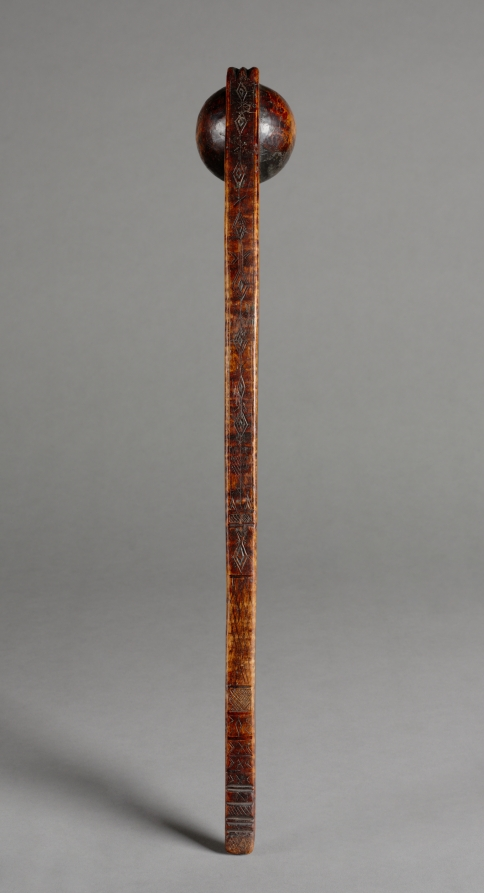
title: Ball-Headed War Club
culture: Native North America, Northeastern Woodlands, Great Lakes, Anishinaabe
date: late 1700s–early 1800s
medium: wood (maple?)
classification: Implements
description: The ball at the striking end of this club is clenched in an abstract, jawlike form that likely refers to a protector animal who endowed the owner with power. Incised on the shaft is a rich record of doodemag (singular, doodem, “totem”)—animals representing other-than-human progenitors from which Anishinaabe peoples trace their descent. (The Anishinaabeg, a group of related Great Lakes nations, include the Odawa, Ojibwe, Potawatomi, and others.) Included is an antlered creature, perhaps a caribou, along with mammals, birds, and powerful spirit beings: the thunderbird, its wings outstretched, and perhaps the long-tailed underwater panther. When this example was made, clubs had become symbols of status and earlier ways of life, having been replaced as favored weapons by metal tomahawks and European firearms. Today, clubs are part of powwow regalia.